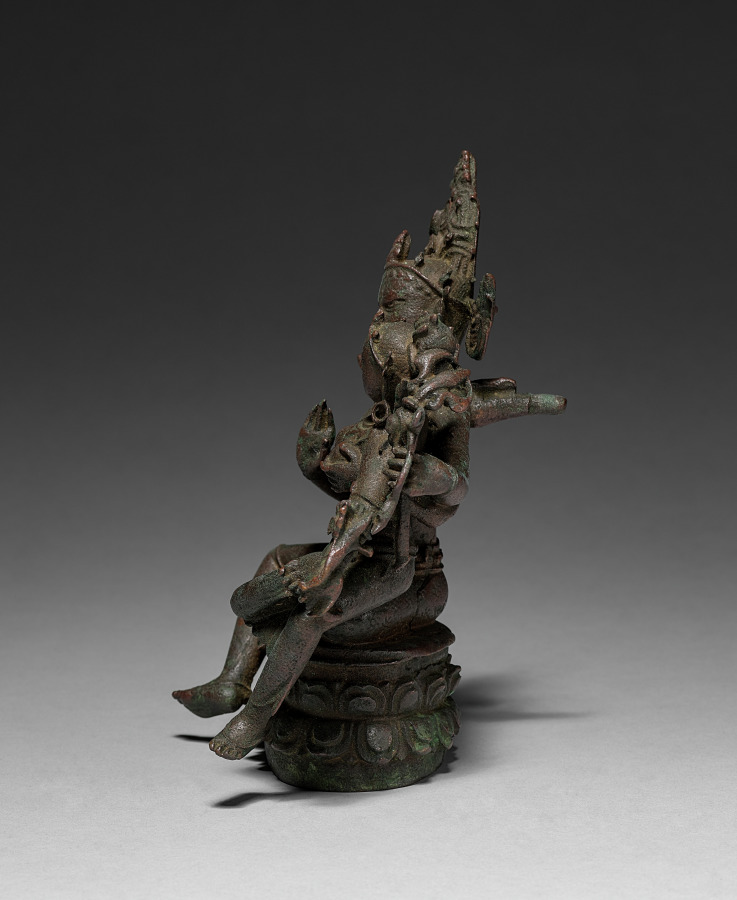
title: Shiva and Parvati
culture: East India, Bengal, Pala period, 9th Century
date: 800s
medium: bronze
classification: Sculpture